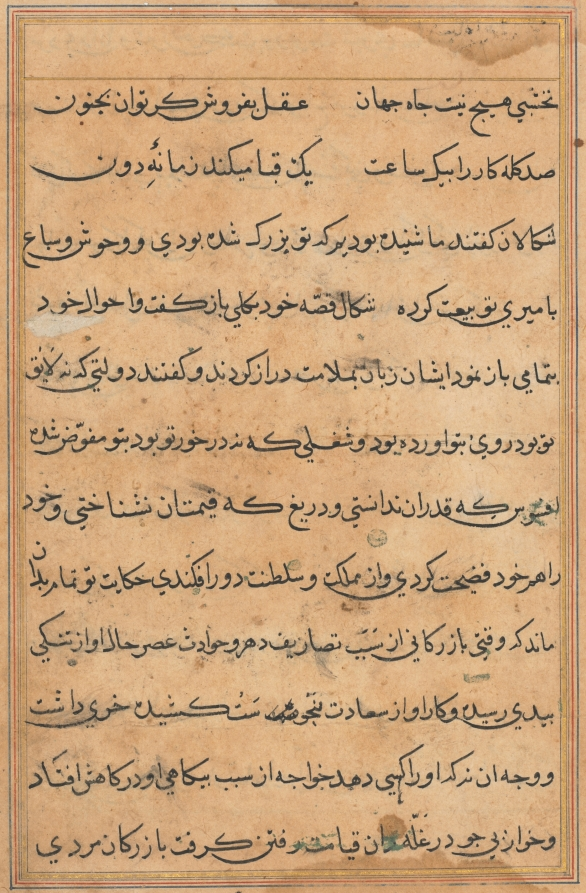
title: Page from Tales of a Parrot (Tuti-nama): text page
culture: Mughal India, court of Akbar (reigned 1556–1605)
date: c. 1560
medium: gum tempera, ink, and gold on paper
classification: Painting